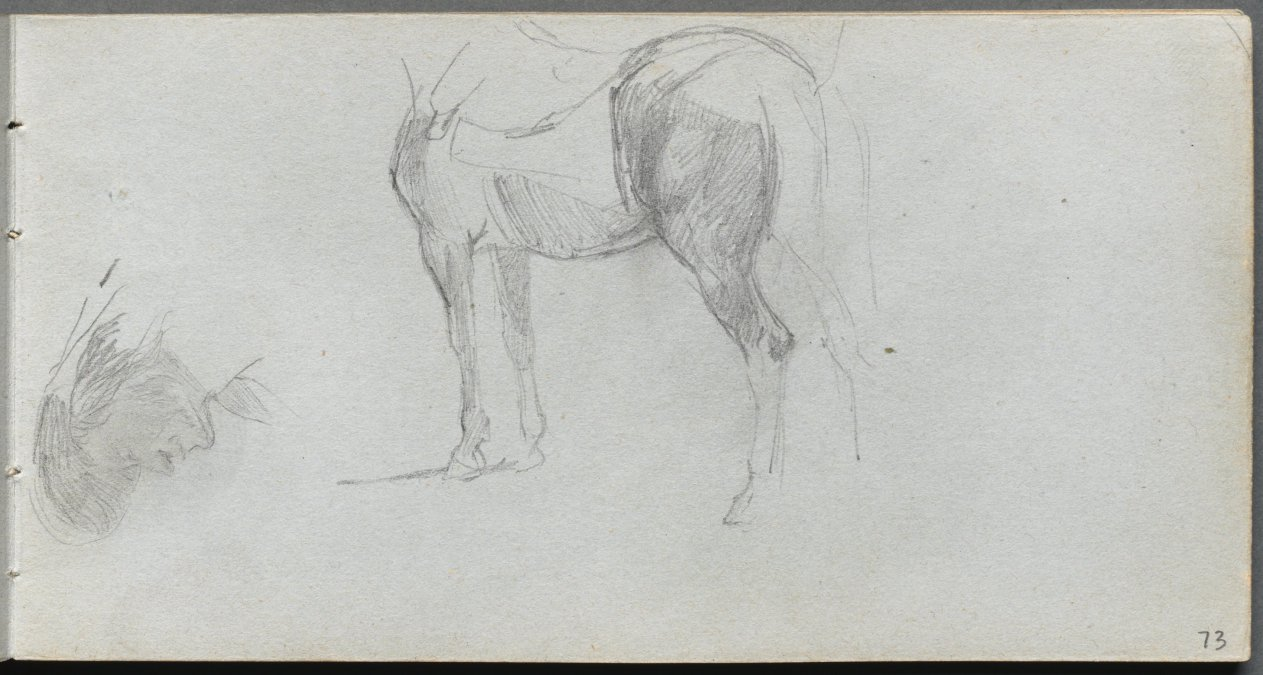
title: Sketchbook, page 73: Study of a Horse, profile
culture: France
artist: Ernest Meissonier (French, 1815–1891)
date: c. 1860s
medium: graphite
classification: Bound Volume